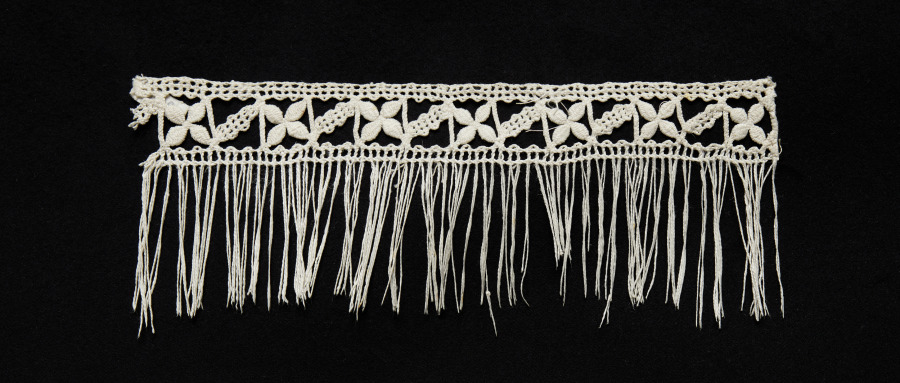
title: Lace Insertion with Fringe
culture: Italy, Genoa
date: 1550–99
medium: linen: bobbin lace (needle lace, reticella design)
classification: Lace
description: Although this fringed bobbin lace fragment is made of linen, its format is like those for laces made of gold, silver, and colored silk threads.